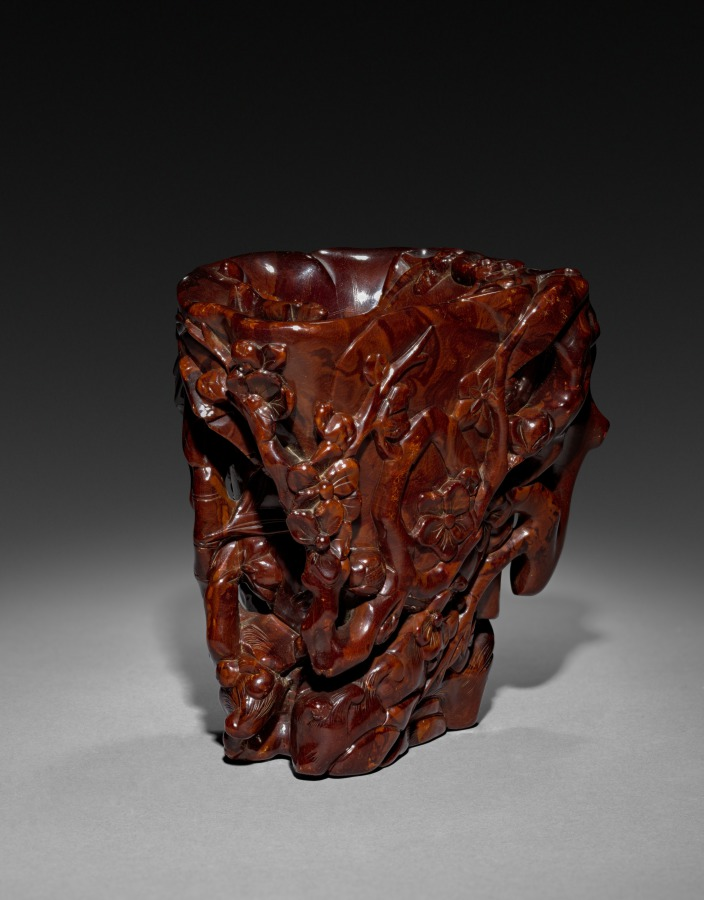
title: Cup with Prunus Blossoms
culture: China, Qing dynasty (1644-1911)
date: 1700s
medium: opaque mottled reddish-brown amber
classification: Stone